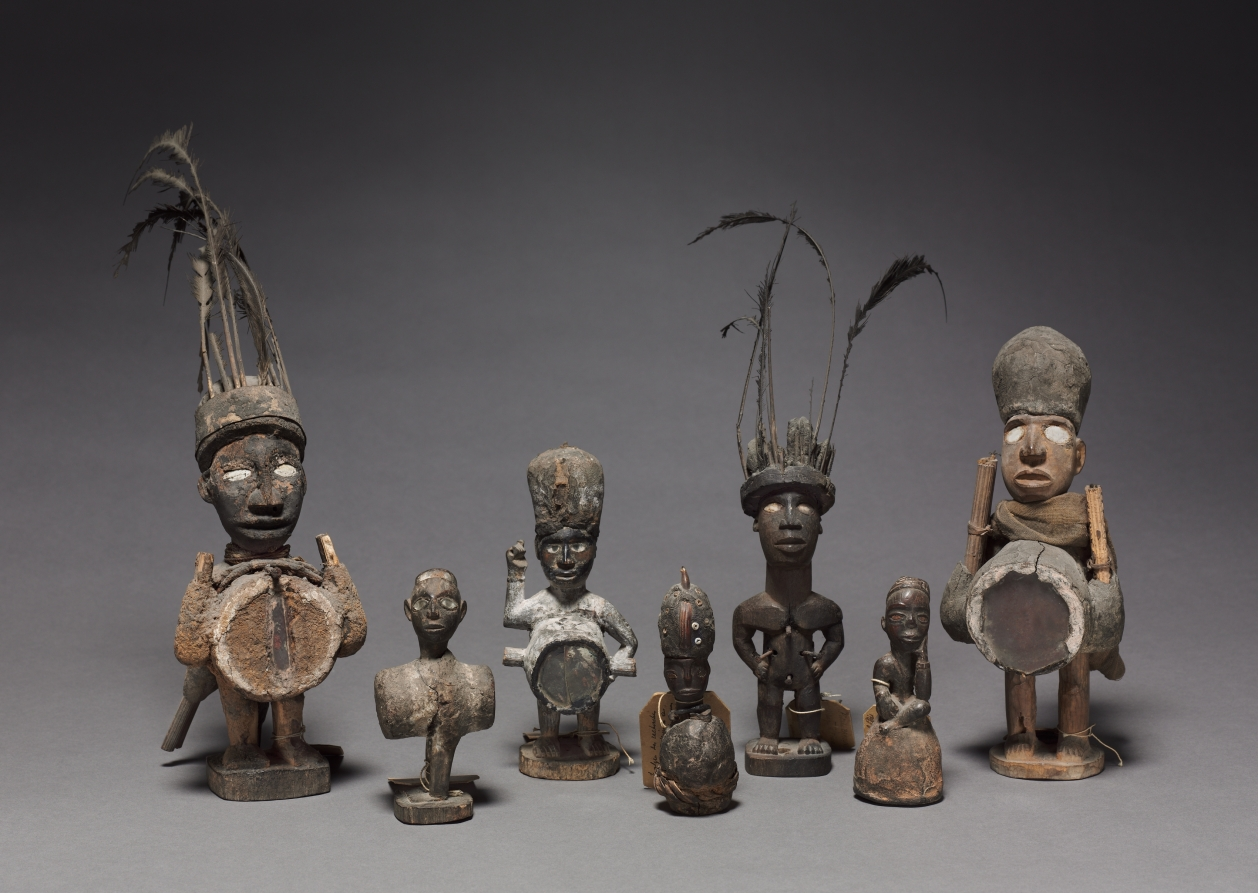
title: Power figure (nkisi)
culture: Africa, Central Africa, Republic of the Congo, Kongo-style maker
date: late 1800s–early 1900s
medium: Wood, organic materials (including resin), cloth, metalized glass, possibly porcelain, and plant fiber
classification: Sculpture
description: This figure is one of the two tallest of the seven anthropomorphic minkisi figurines previously in the Delenne collection. Identified as an nduda, two upward “guns” are attached on its side loaded with gunpowder used to shoot witches. Its label bears the word colique, a term referring to heavy pains caused by intestinal obstruction.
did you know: The object’s two small guns are pointing upward, but bears the label “colique,” a term referring to heavy pains caused by intestinal obstruction.